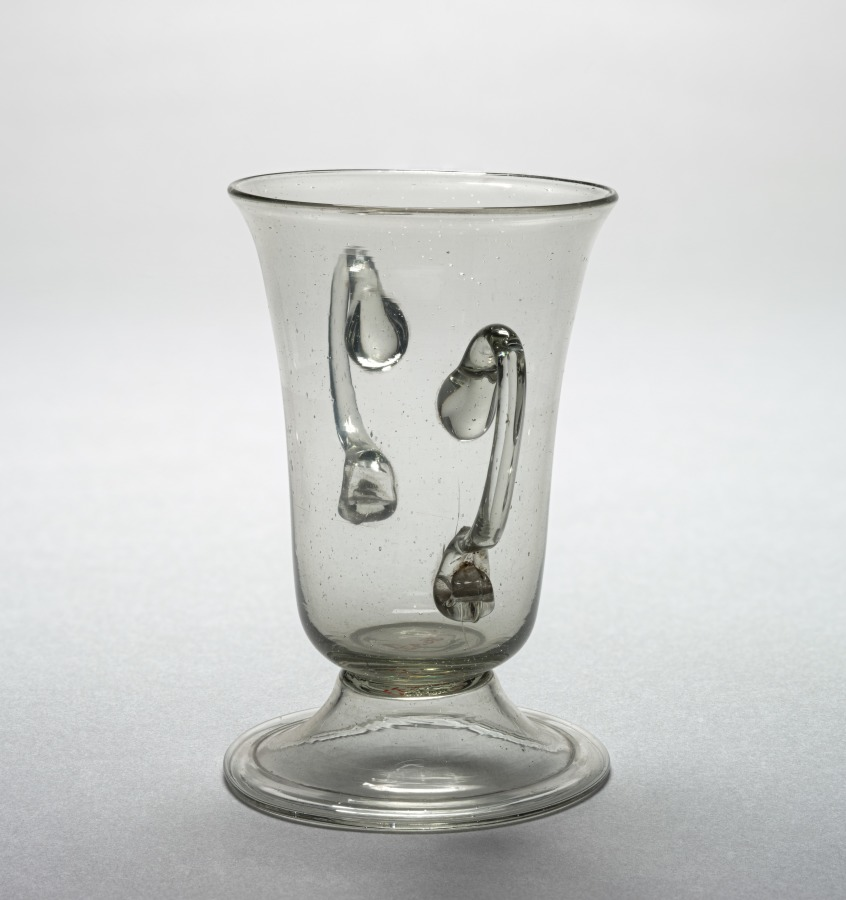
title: Syllabub Glass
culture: England, 18th century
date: c. 1720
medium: glass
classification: Glass